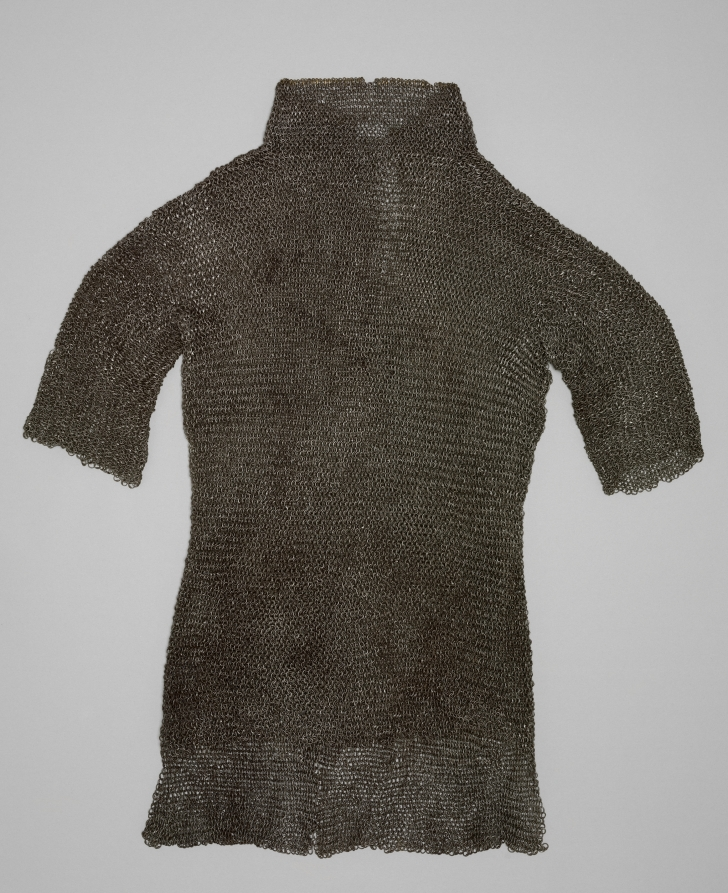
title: Hauberk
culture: European, 15th century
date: 1400s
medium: riveted steel rings; close woven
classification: Arms and Armor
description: By the early 1400s the hauberk was being worn as an accessory to supplement full or partial plate armor. It offered a secondary level of protection for areas not fully covered by plate armor, such as the armpit and groin. The making of chainmail involved the linking of thousands of small rings of steel.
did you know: Mail provided excellent defense against the sword cut, though only limited defense against crushing blows from weapons like the mace or the battle axe.